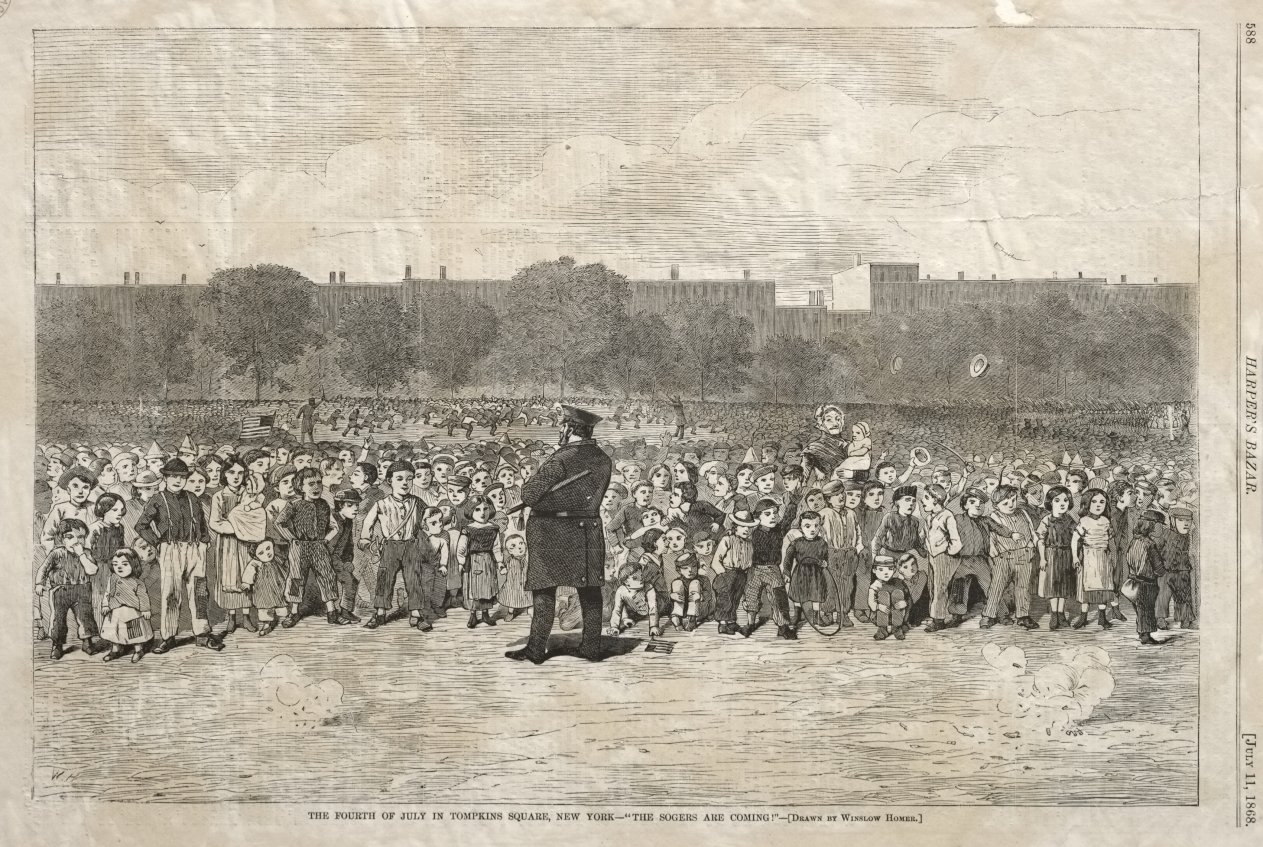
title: The Fourth of July in Tompkins Square, New York - "The Sogers Are Coming"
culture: America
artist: Winslow Homer (American, 1836–1910)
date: 1868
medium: wood engraving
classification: Print